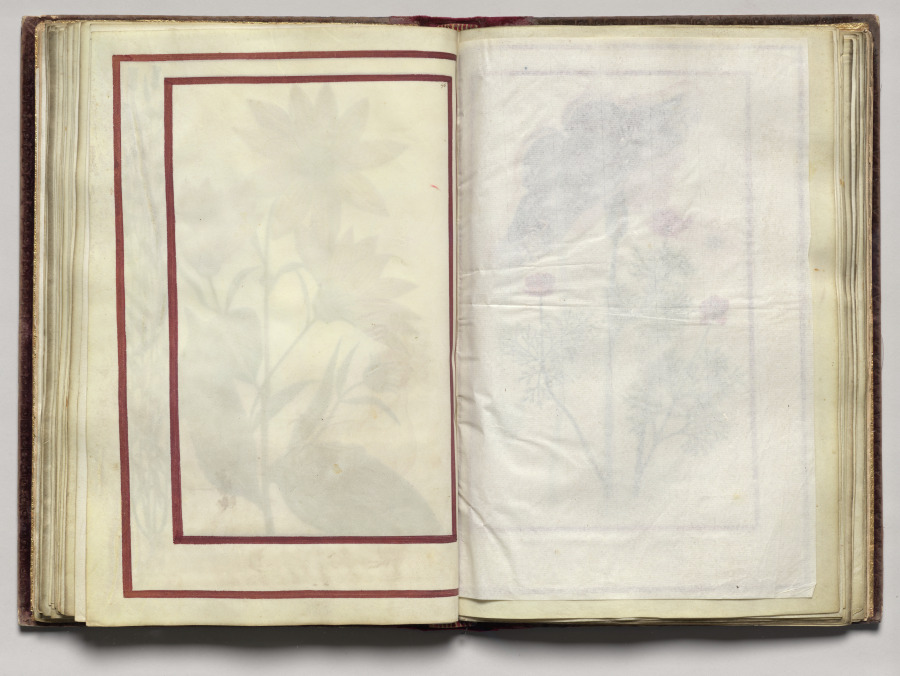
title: Border, folio 28 (verso), from Florilegium (A Book of Flower Studies)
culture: France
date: 1608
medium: watercolor, ink, silver and gold over occasional traces of pencil, on vellum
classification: Bound Volume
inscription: Dated: Poitiers 1608 (on frontispiece) Signed: On frontispiece in black ink, lower right: Van Kuyk Notation on drawing: Frontispiece: in pencil, lower margin: * élève de Van Kessel, peintre flammand (* in pencil also appears in front of Van Kuyk's name).